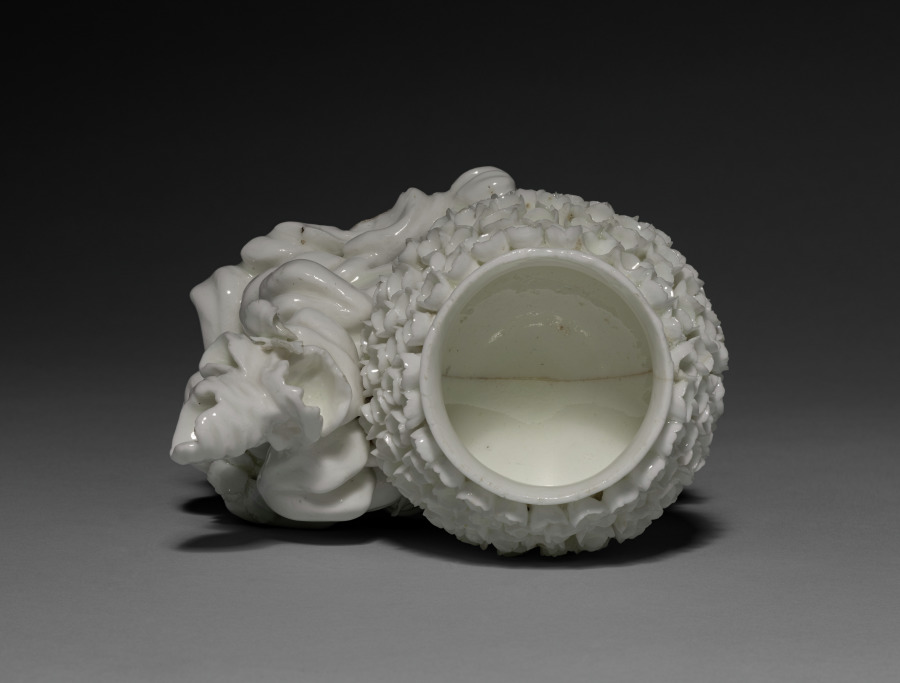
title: Potpourri Vase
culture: France, Vincennes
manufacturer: Vincennes Porcelain Factory (France, 1740–56)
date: c. 1750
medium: soft-paste porcelain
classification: Ceramic